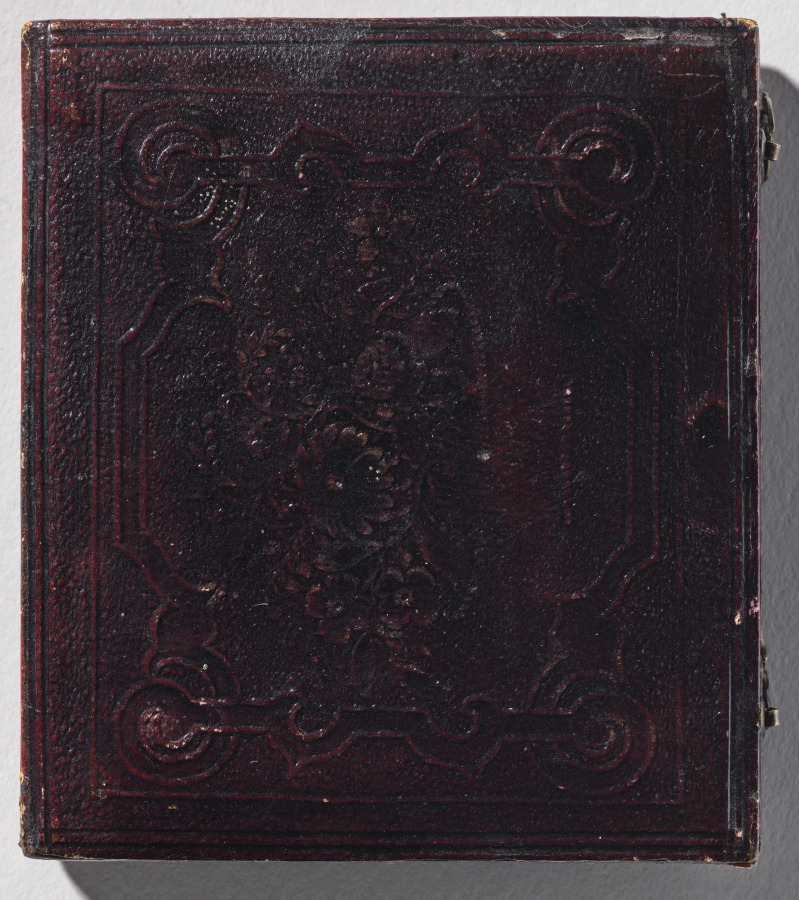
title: Mother and Child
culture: America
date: c. 1860–65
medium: daguerreotype, applied color, sixth-plate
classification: Photograph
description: Some of the most inventive and technically skilled practitioners in the early history of photography are as yet unidentified. However, with time more of these individuals will probably be recognized by name. Introduced into America soon after its invention in 1839 by the Frenchman Louis-Jacques-Mandé Daguerre, the daguerreotype flourished from 1840 to the mid-1860s. This beautiful daguerreotype in its original case is an outstanding example of a very popular subject: mother and child. The polished silver plate precisely renders in warm tones the likeness of the elaborately dressed sitters. The mother gently steadied the child's head so that it would not move during the long exposure required by the daguerreotype process. Clearly, the maker's knowledge of chemistry and traditional principles of design were necessary for this charming portrait.